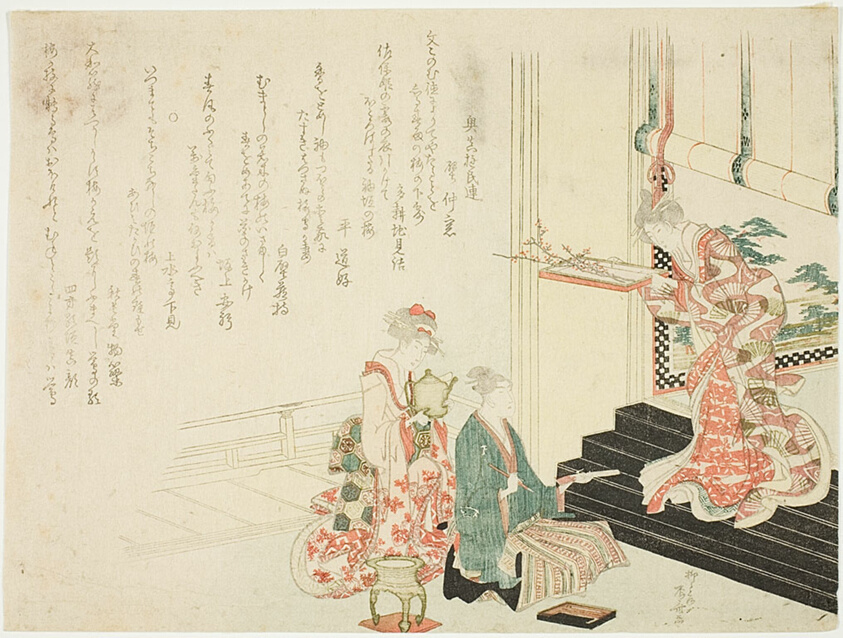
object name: Print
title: Literati Painting the Plum Flowers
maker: Ryuryukyo Shinsai (Japanese, c. 1764-1820)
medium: Color woodblock print; surimono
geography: Japan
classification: woodblock print; print; asian art